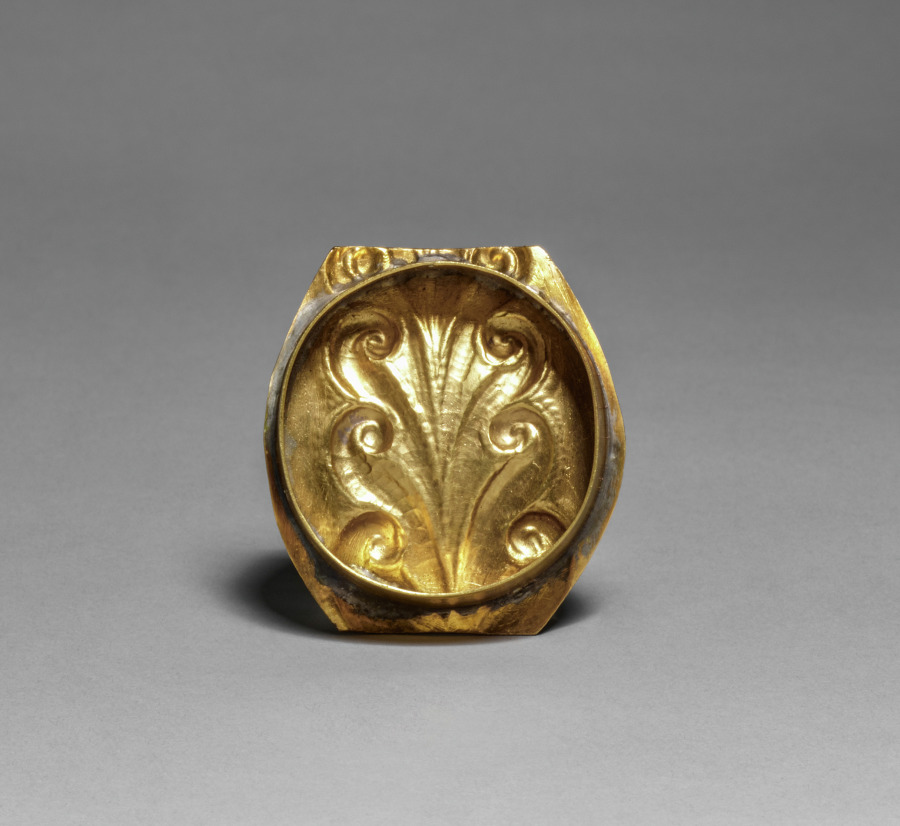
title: Container in the Form of a Unicorn (lid)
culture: China, Qing dynasty (1644-1911), Qianlong mark and reign (1736-95)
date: 1736–95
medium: gilt copper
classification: Enamel